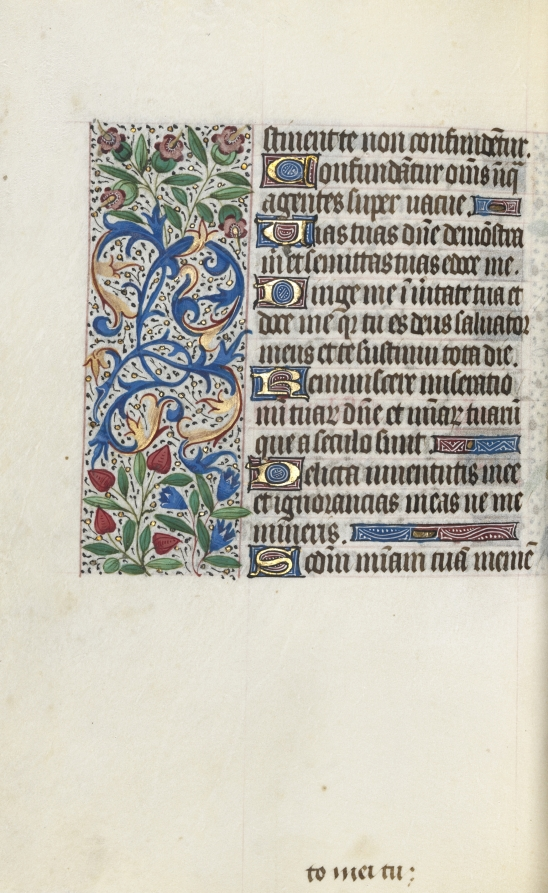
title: Book of Hours (Use of Rouen): fol. 118v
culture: France, Rouen, 15th century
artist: Master of the Geneva Latini (French, active Rouen, 1460–80)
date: c. 1470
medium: ink, tempera, and gold on vellum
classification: Bound Volume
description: In the late 1400s and early 1500s Rouen was an established and important center of book production. The city’s cathedral had a wealthy chapter that spent large sums of money to commission books and to maintain its extensive library. The stationers and booksellers would have likely been concentrated in or near the cathedral precinct. This artist, named after a manuscript now in Geneva, was Rouen’s principal illuminator during the second half of the 1400s.